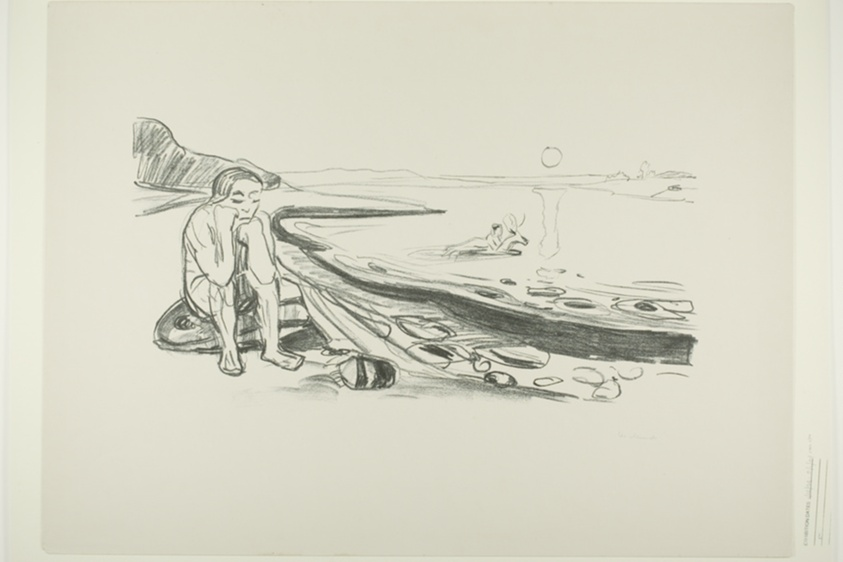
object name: Print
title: Omega's Flight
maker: Edvard Munch (Norwegian, 1863-1944)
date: 1908/09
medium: Lithograph on paper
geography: Norway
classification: lithograph; print; prints and drawing